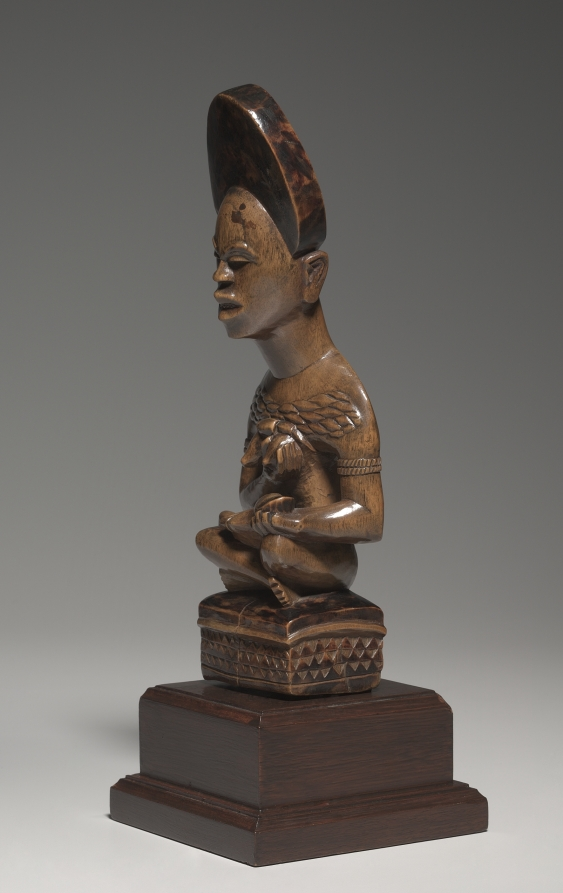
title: Woman and Child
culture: Africa, Central Africa, Democratic Republic of Congo, Yombe-style carver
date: mid- to late 1800s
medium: Wood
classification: Sculpture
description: This mother-and-child figure was probably part of a cult concerned with the treatment of infertility. Both her jewelry and her seated pose indicate that the woman occupied a high rank in her community. Her miter-shaped hairstyle, chiseled teeth, and raised body scars--considered to be marks of beauty and perfection--signal that the woman incarnates the founding ancestor of a kinship group.